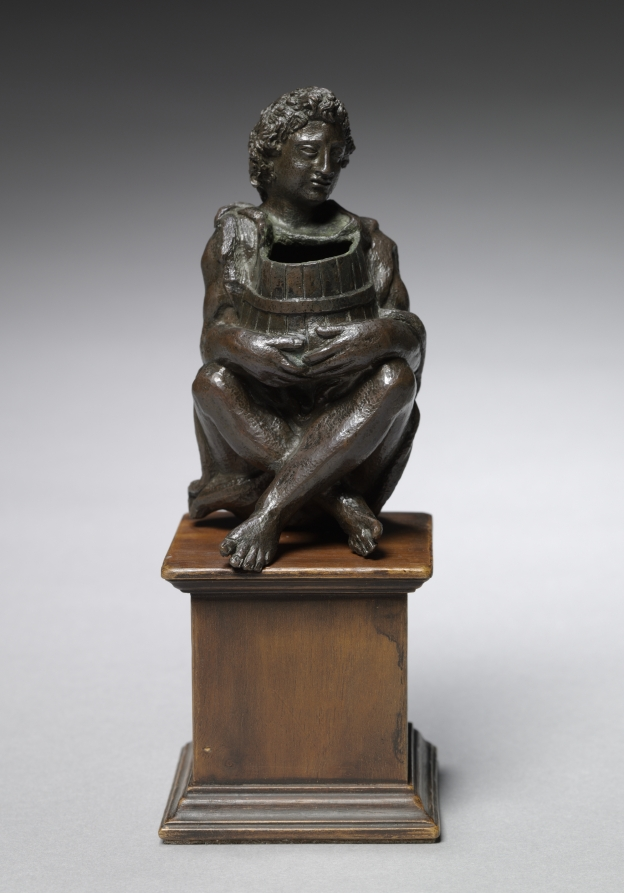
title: Seated Boy Clothed with Goat Skins Holding an Open Barrel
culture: Italy, Padua, 16th century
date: c. 1525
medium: bronze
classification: Sculpture